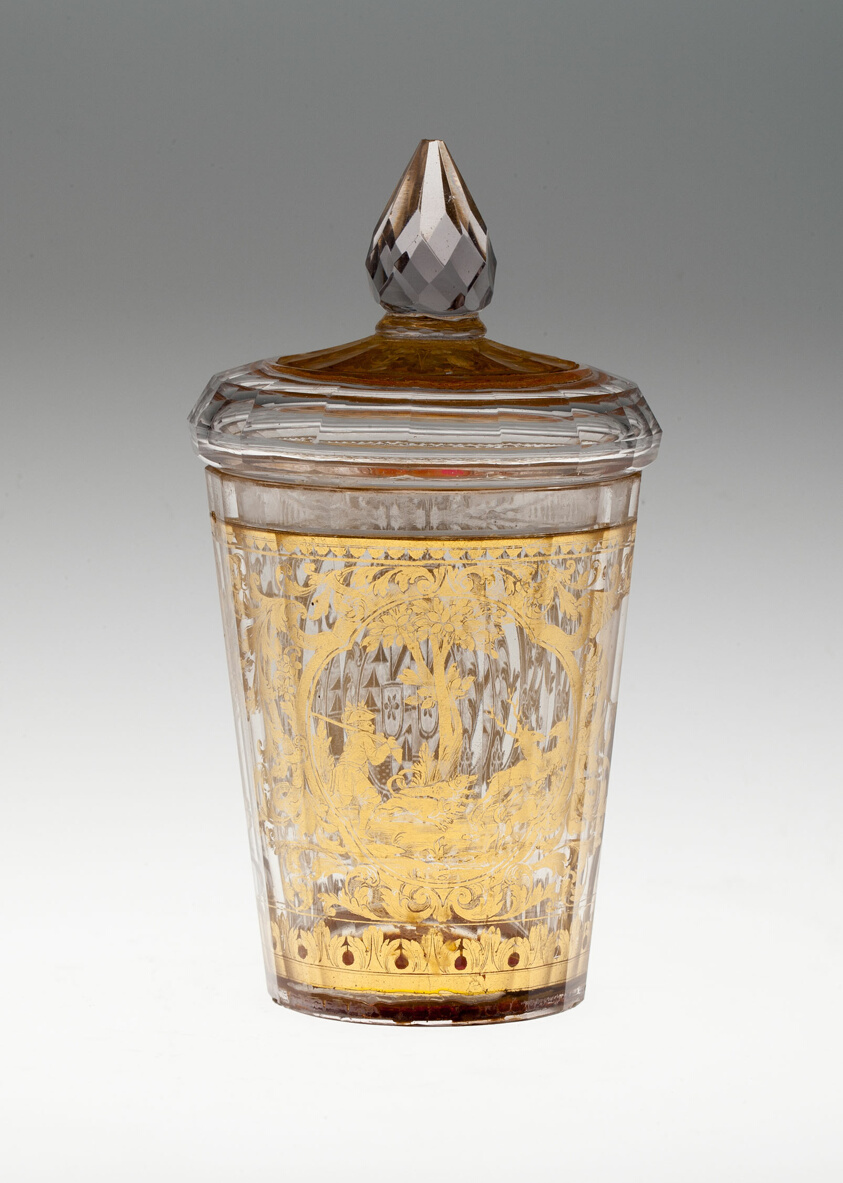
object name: Glass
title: Covered Beaker with Coat of Arms and Hunting Scene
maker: Bohemia, Czech Republic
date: c. 1730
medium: Glass with engraved gold leaf decoration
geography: Bohemia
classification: drinking vessel; glass; european decorative arts